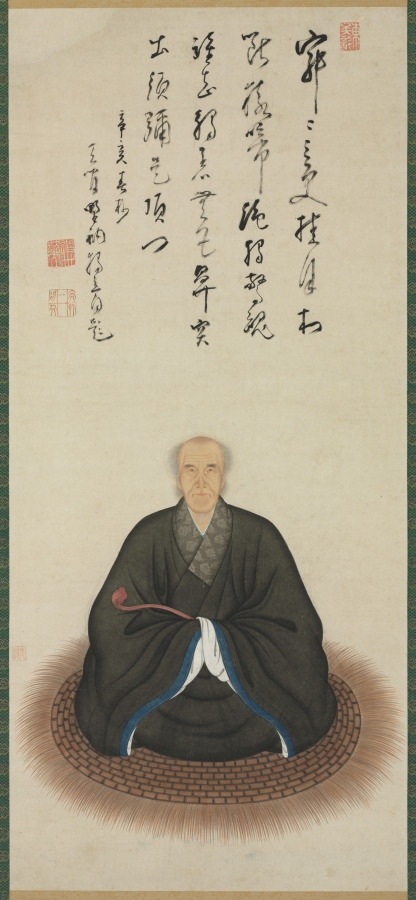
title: Portrait of Duli Xingyi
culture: Japan, Edo period (1615–1868)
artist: Kita Genki (Japanese, active c. 1664–98)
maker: Duli Xingyi (Chinese, 1596–1672)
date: 1671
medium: hanging scroll; ink and color on paper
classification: Painting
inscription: 1671 inscription at top of scroll by Duli Xingyi with three seals, 東矣䪩 (prefatory), 遺世獨立 (top) , 天外一閒人 (bottom); seal of Genki at lower left of painting 元規 .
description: In this portrait, the Ōbaku school Buddhist monk Duli Xingyi (born Tai Li, 1596–1672), whose name is pronounced Dokuryū Shōeki in Japanese, sits upon a woven mat holding a ceremonial scepter known as a ruyi, or nyoi in Japanese. Above his head is an insciption he added to the painting in 1671, the year before his death. It may be translated to read: Contemplative emptiness: the moon suspended over the village at midnight. Suddenly my soul is startled by the howl of an ape. Who could know that it would arouse me beyond my senses, and bring me an inner vision from Mt. Sumeru. (translated by Stephen Addiss and Kwan S. Wong) Originally from what is now the city of Hangzhou in China, Duli emigrated to Japan in 1653, where he took monastic vows. His skills in calligraphy and seal carving were formidable. Painter Kita Genki combined Chinese brush styles he learned in Nagasaki with Western painting techniques to capture Duli's likeness.